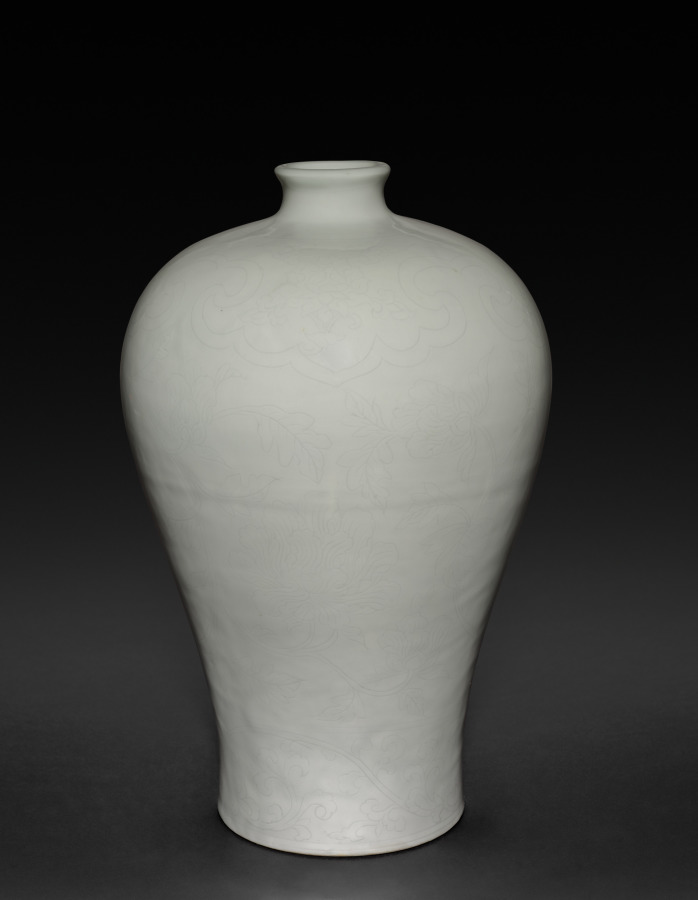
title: Meiping Vase with Cloud Collars and Peony Sprays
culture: China, Jiangxi province, Jingdezhen kilns, Ming dynasty (1368-1644), Yongle period (1403-1424)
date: 1403–24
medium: porcelain with incised decoration and white glaze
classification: Ceramic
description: This beautiful vase, called a meiping, is a testimony to the extremely high standards demanded for imperial white porcelain of the Yongle period. It is exquisitely potted and subtly decorated with "hidden decoration" (anhua) incised into the body. The clear glaze over the white body has a luster and purity; the white color radiates with a soft glow like melting snow, described by the Chinese connoisseurs as tianbai, or "sweetwhite." Tianbai wares were produced for use in imperial offerings and have always been considered a great achievement of the Yongle period.